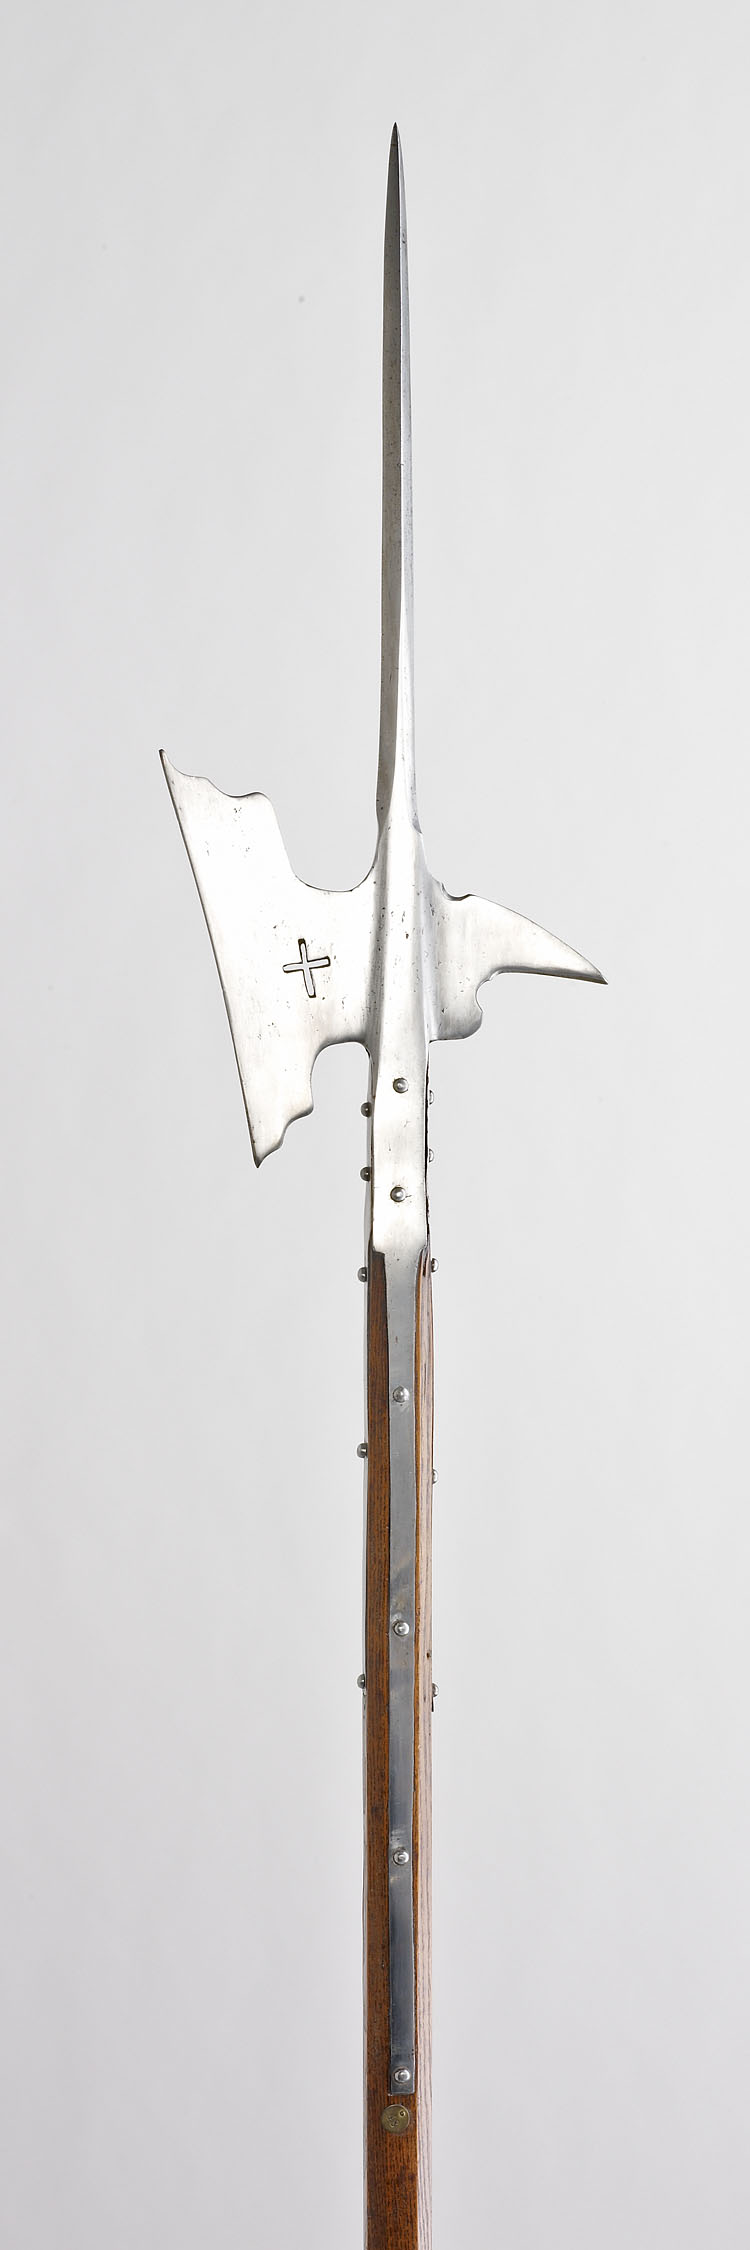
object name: Arms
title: Halberd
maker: Hans Ulrich Hermann (Swiss, active c. 1600-25)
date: 1600-25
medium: Steel and wood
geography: Switzerland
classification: edged weapon-staff; arms; arms and armor